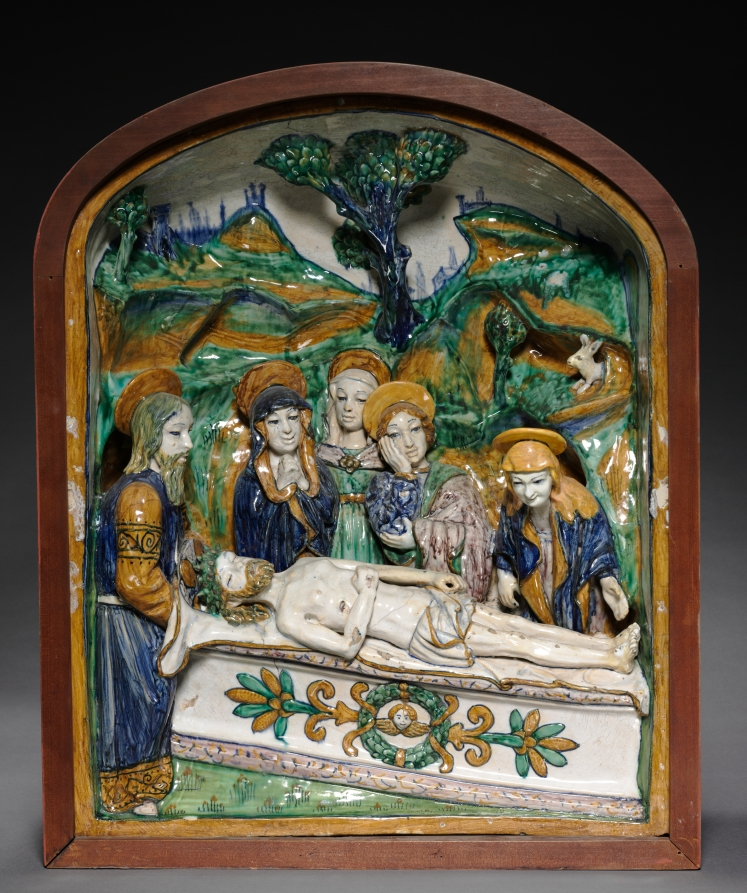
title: The Entombment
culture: Italy, Faenza, 15th century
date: late 1400s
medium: glazed terracotta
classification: Ceramic